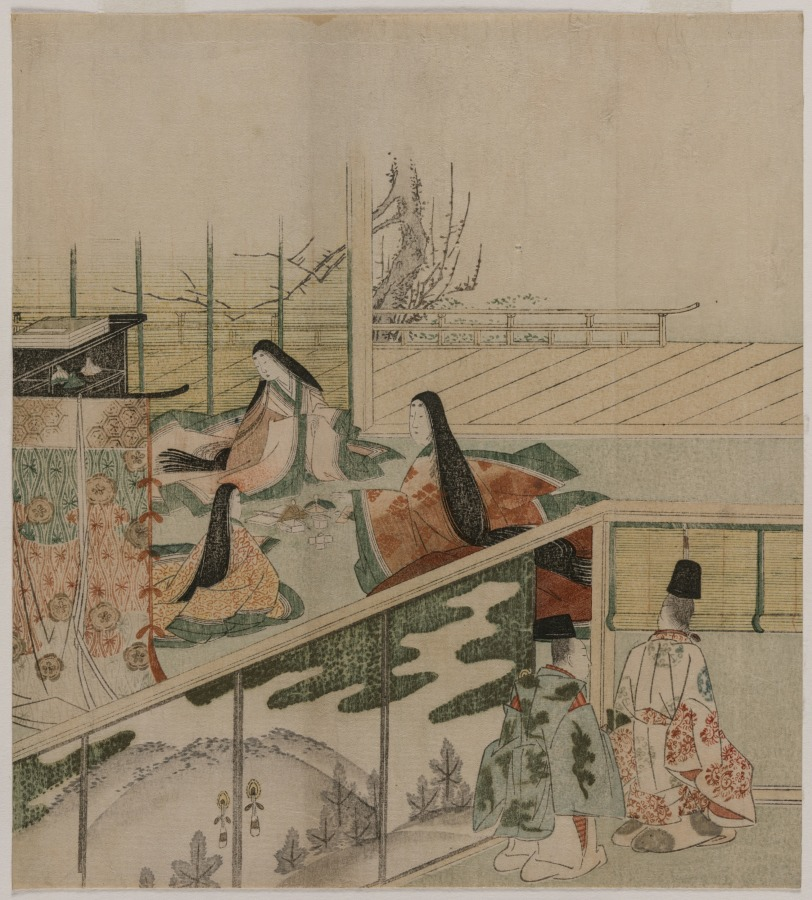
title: Court Ladies Making Dolls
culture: Japan, Edo period (1615–1868)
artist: attributed to Kubo Shunman (Japanese, 1757–1820)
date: 1790s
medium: color woodblock print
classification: Print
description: Since ancient times dolls were used in Japan for religious purposes, especially for the healing of impurities or illness. Mothers often presented dolls to shrines to secure the protection of kami (spirits) for their children. Each year there is a doll festival (Hina Matsuri) or Girl's Festival on March 3rd at which families display heirloom sets of dolls dressed in costumes of the ancient imperial court. This is a section of a surimono (a print in which an image is combined with poetry to celebrate a special event) or an album page.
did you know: Myrta Leonora Jones, the donor of this work, was a women’s rights activist in Cleveland in the early 20th century.